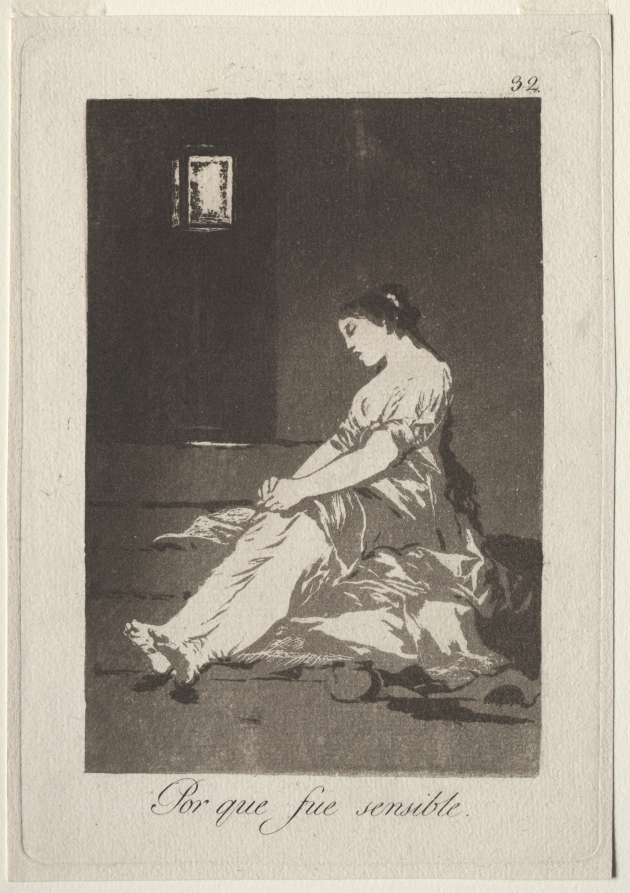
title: Because She Was Susceptible, Plate 32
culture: Spain, late 18th Century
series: Los Caprichos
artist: Francisco de Goya (Spanish, 1746–1828)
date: 1799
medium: aquatint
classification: Print